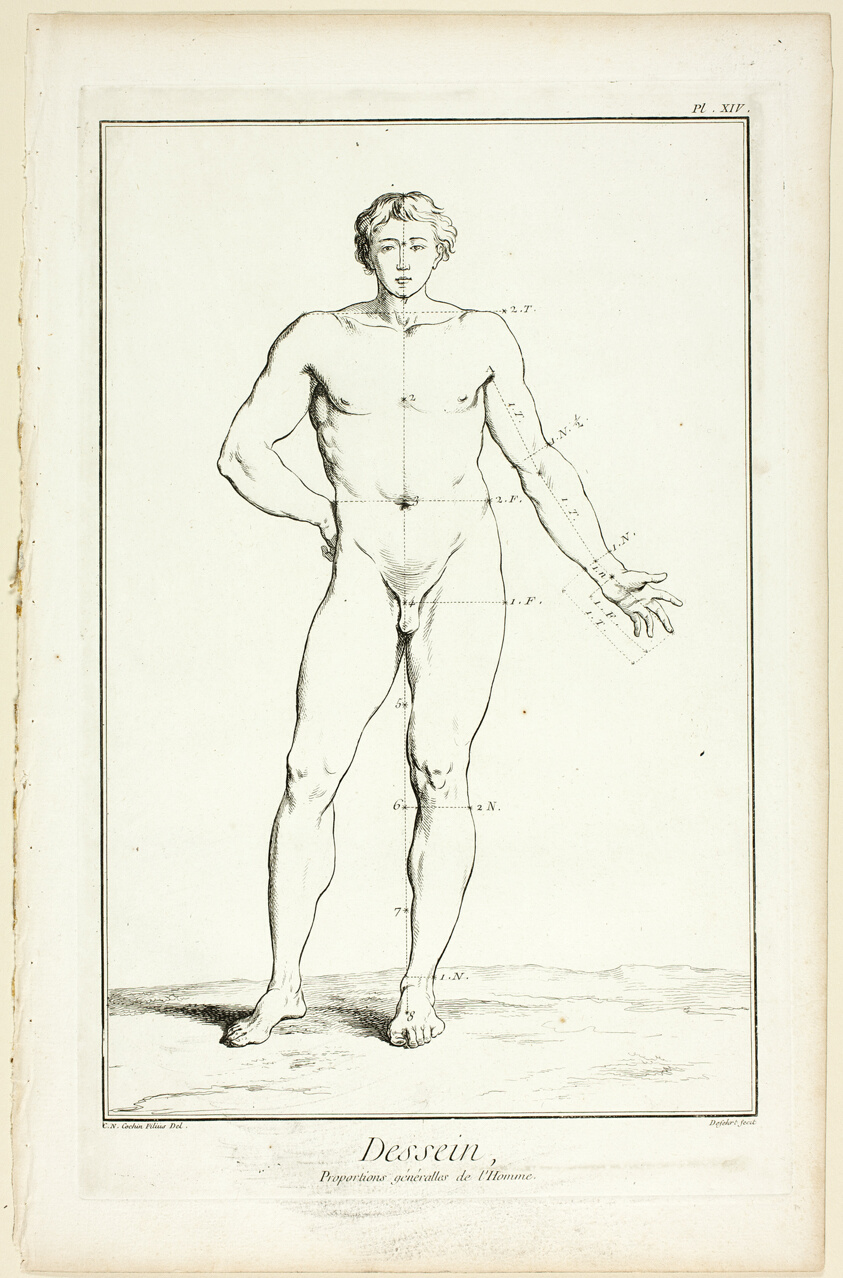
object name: Print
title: Design: General Proportions of the Male, from Encyclopédie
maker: A. J. Defehrt (French, active 18th century); after Charles-Nicholas Cochin, the younger (French, 1715-1790); published by André le Breton (French, 1708-1779), Michel-Antoine David (French, c. 1707-1769), Laurent Durand (French, 1712-1763), and Antoine-Claude Briasson (French, 1700-1775)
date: 1762/77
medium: Etching, with engraving, on cream laid paper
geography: France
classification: etching; print; prints and drawing